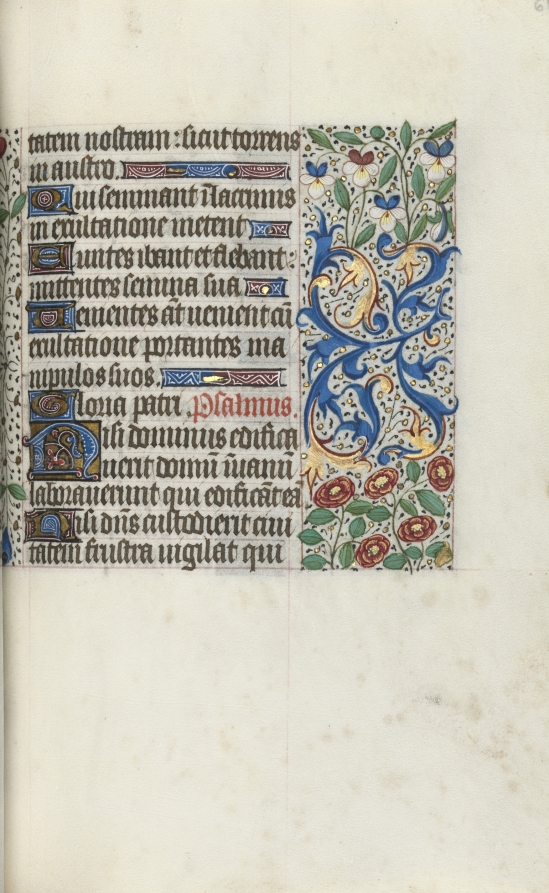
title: Book of Hours (Use of Rouen): fol. 68r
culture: France, Rouen, 15th century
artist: Master of the Geneva Latini (French, active Rouen, 1460–80)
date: c. 1470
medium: ink, tempera, and gold on vellum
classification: Bound Volume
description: In the late 1400s and early 1500s Rouen was an established and important center of book production. The city’s cathedral had a wealthy chapter that spent large sums of money to commission books and to maintain its extensive library. The stationers and booksellers would have likely been concentrated in or near the cathedral precinct. This artist, named after a manuscript now in Geneva, was Rouen’s principal illuminator during the second half of the 1400s.